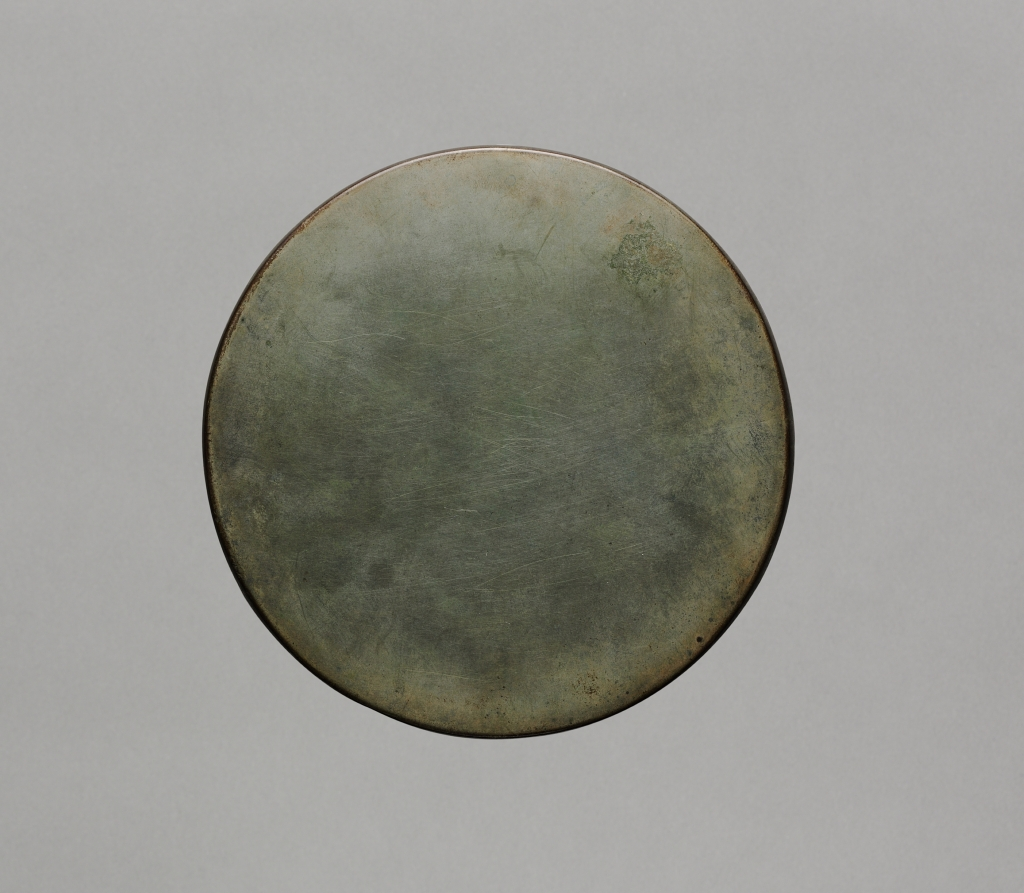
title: Mirror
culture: Japan, Kamakura period (1185–1333)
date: 1185–1333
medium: bronze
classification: Metalwork